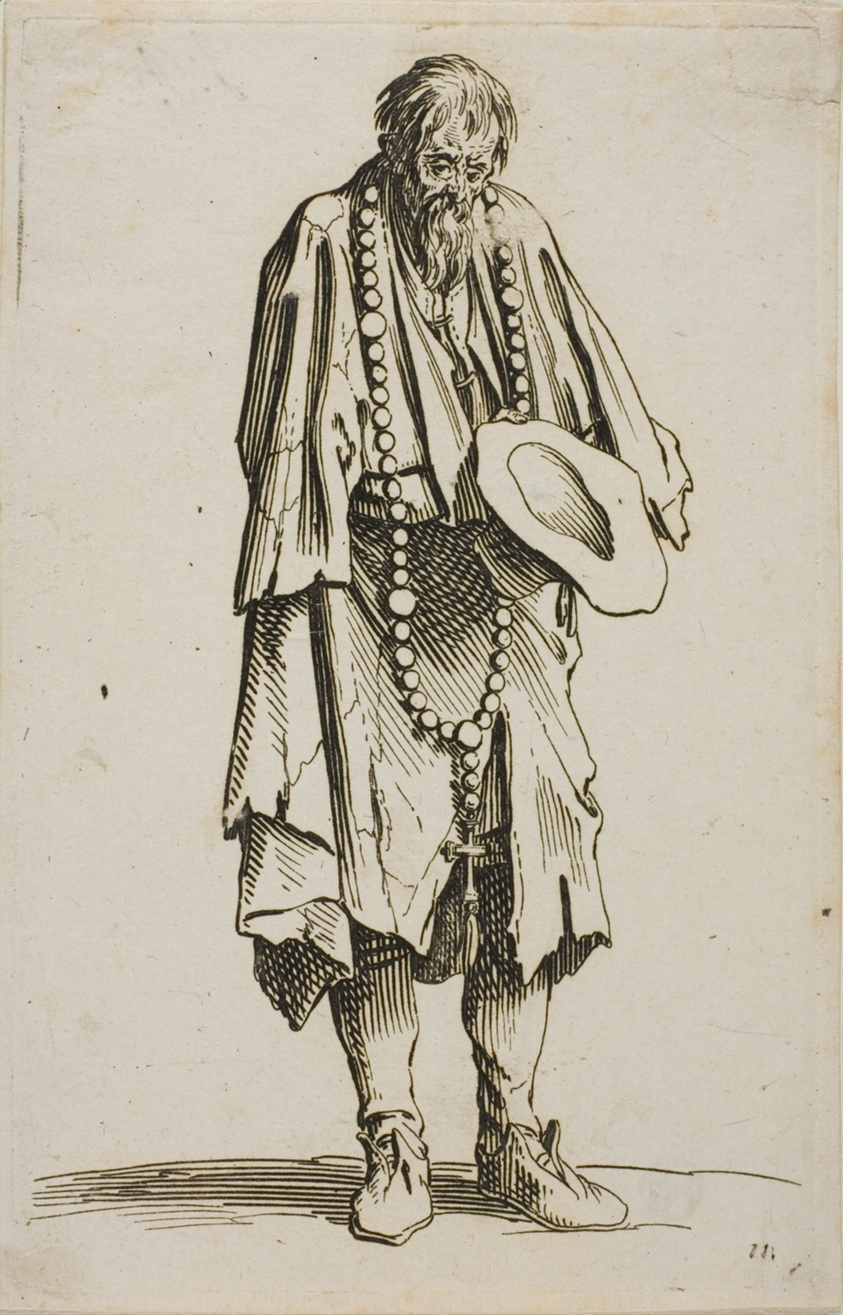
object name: Print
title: The Beggar with a Rosary, plate eleven from The Beggars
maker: Jacques Callot (French, 1592-1635)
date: c. 1622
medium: Etching on paper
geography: France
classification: etching; print; prints and drawing